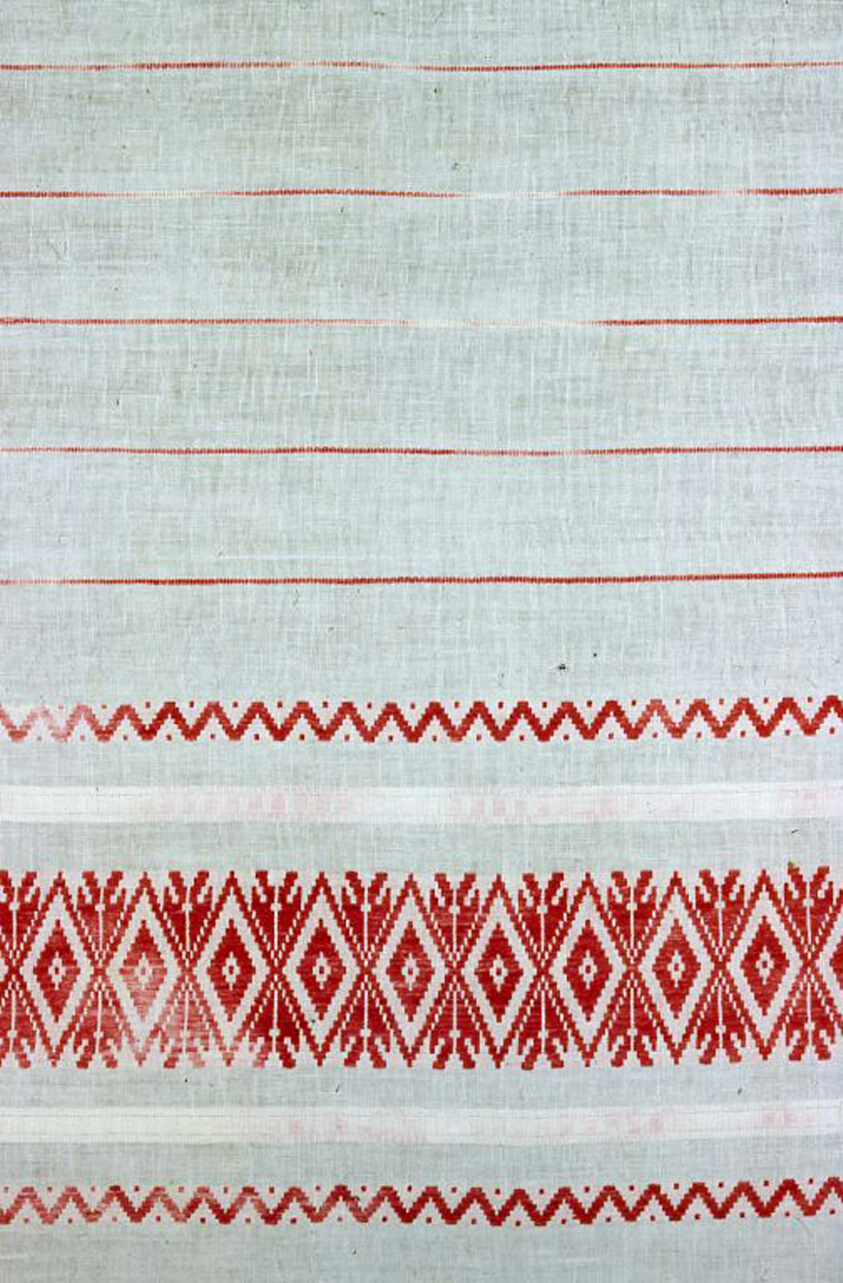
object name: Textile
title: Over Towel Section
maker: Sweden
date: c. 1775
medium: Cotton, plain weave; brocaded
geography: Sweden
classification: textile; weaving